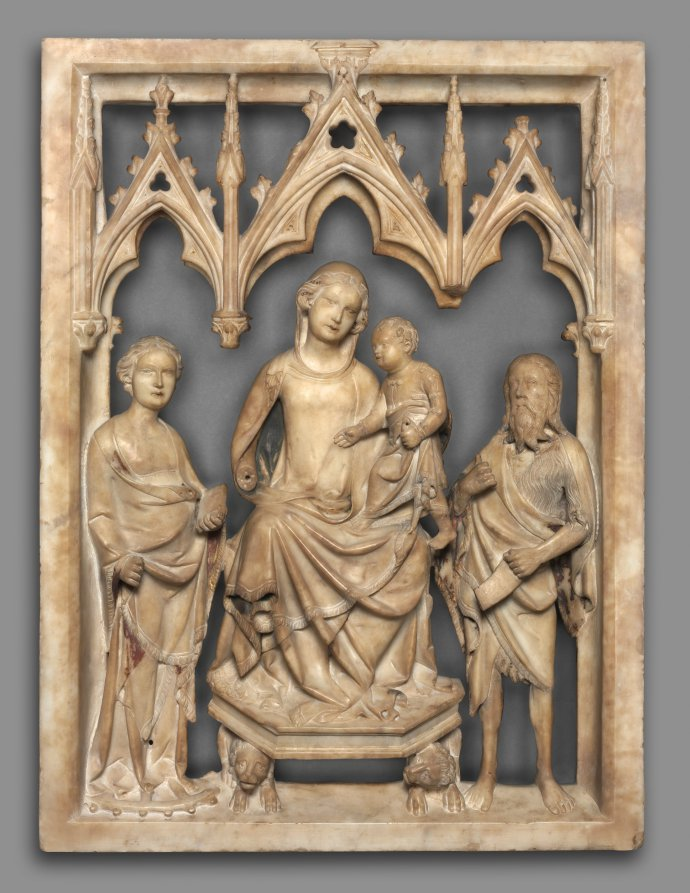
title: Madonna and Child with Saints Catherine and John the Baptist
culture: Italy, Siena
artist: Giovanni di Agostino (Italian, c. 1310–1370)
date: c. 1340–50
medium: marble with traces of polychromy and gilding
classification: Sculpture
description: The Madonna is seated beneath a Gothic-arched canopy flanked by Saints Catherine and John the Baptist. A rectangular frame encloses the group. Most likely from a Sienese church interior, the work is probably a fragment of a larger sculptural program such as a tomb. An authentic Gothic style in sculpture appeared in Tuscany from the mid 1200s through about 1350 elucidated by the work of Giovanni di Agostino, Nicola and Giovanni Pisano, and others who were active on Siena Cathedral’s sculptural program. Agostino’s work suggests an awareness of Gothic sculpture and the decorative arts in France from which he borrowed freely. This relief was probably completed just before the plague of 1348, an event which altered the degree and character of Sienese art.